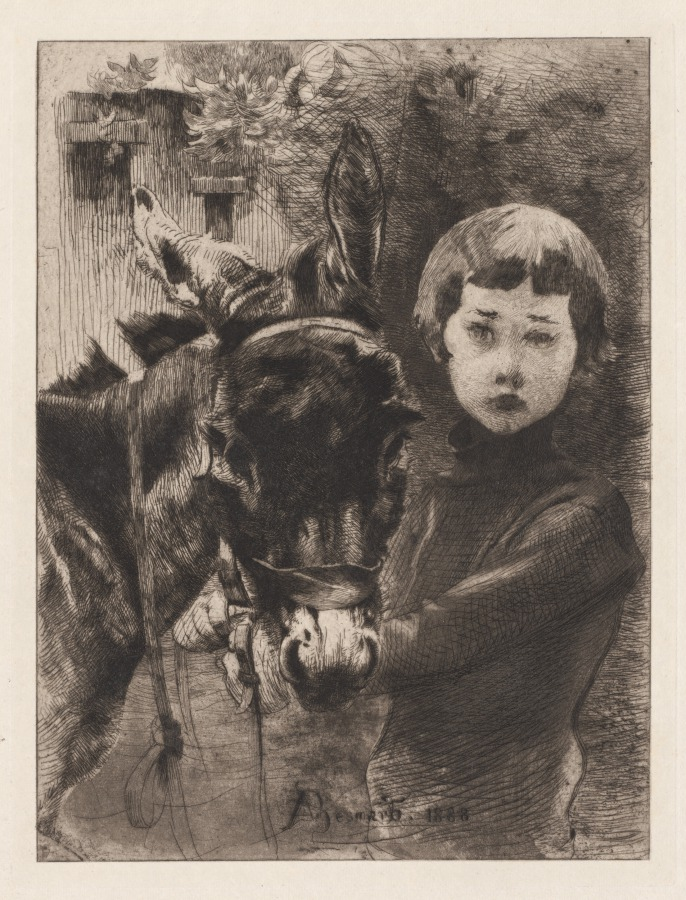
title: Robert Besnard and His Donkey (Robert Besnard et son âne)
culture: France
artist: Albert Besnard (French, 1849–1934)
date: 1888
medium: Etching and aquatint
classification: Print